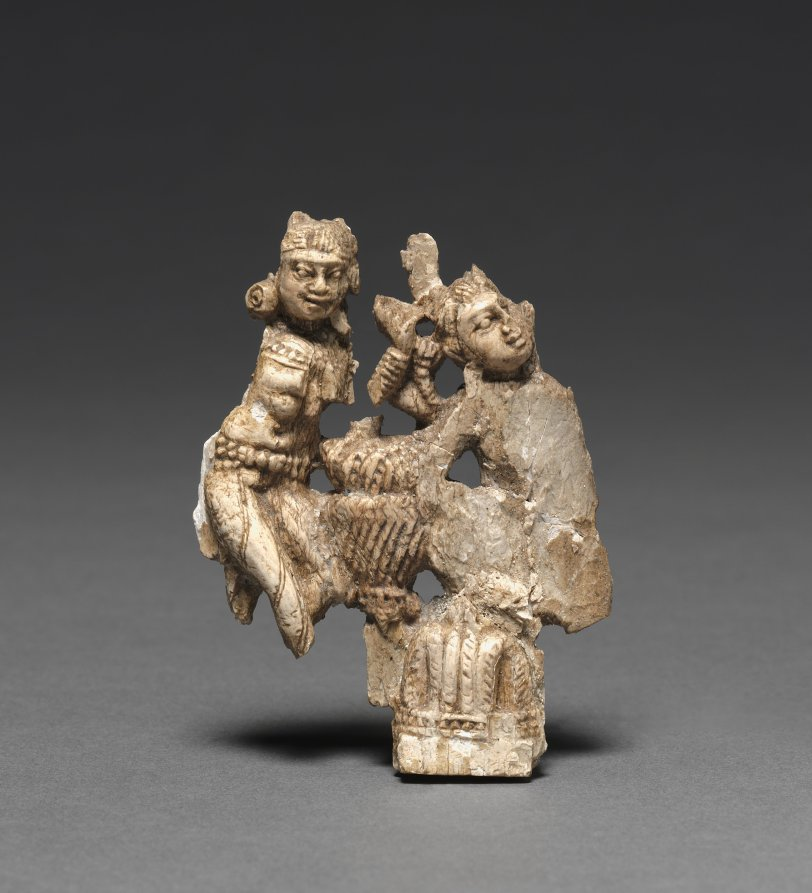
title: Ladies at Toilette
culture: Afghanistan, Begram, Kushan period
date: c. 50–200 CE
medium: ivory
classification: Ivory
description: This ivory carving was made to sheath wooden furniture made in India for trade along the Silk Road, which stretched from Rome to China. One lady adjusts the coiffure of another; a wicker stool is between them. Indian ivory-faced furnishings—along with lacquer boxes from China and painted glass from Rome—were found in an extraordinary deposit of luxury goods at a site called Begram.